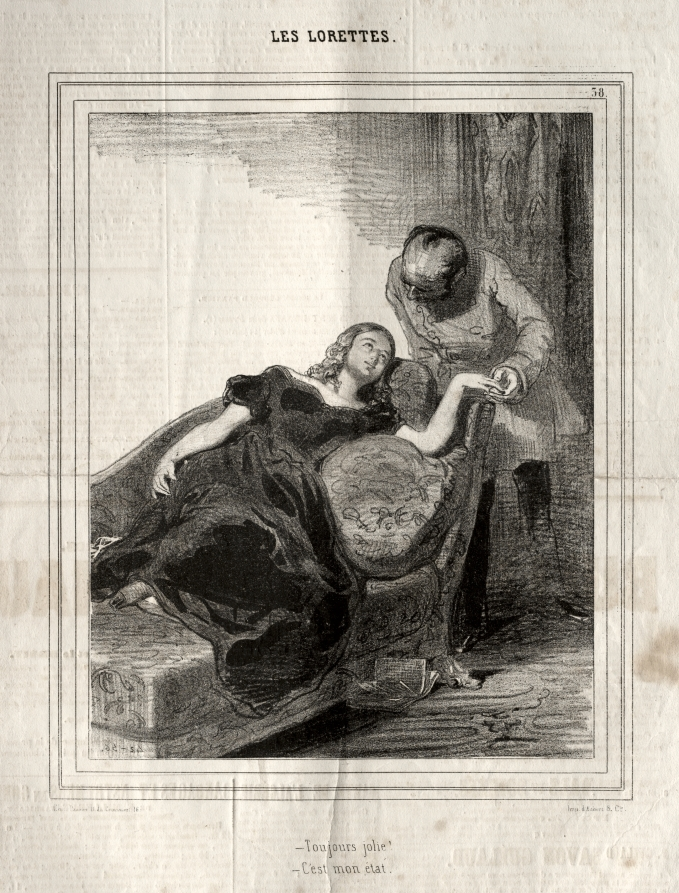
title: Les Lorettes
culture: France, 19th century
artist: Paul Gavarni (French, 1804–1866)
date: 1842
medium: lithograph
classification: Print